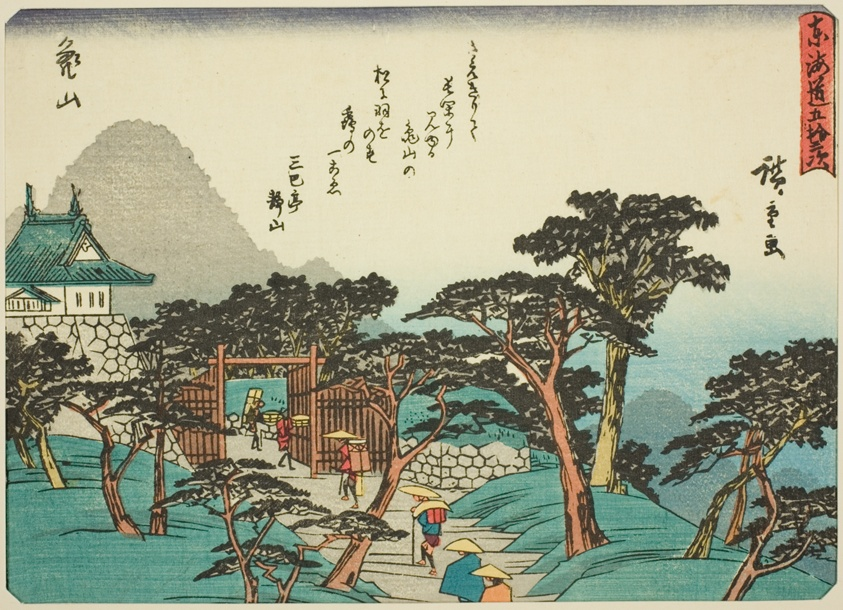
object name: Print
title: Kameyama, from the series "Fifty-three Stations of the Tokaido (Tokaido gojusan tsugi)," also known as the Tokaido with Poem (Kyoka iri Tokaido)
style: Japanese (culture or style)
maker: Utagawa Hiroshige 歌川 広重; Japanese, 1797-1858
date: c. 1837/42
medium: Color woodblock print; chuban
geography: Japan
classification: woodblock print; print; asian art